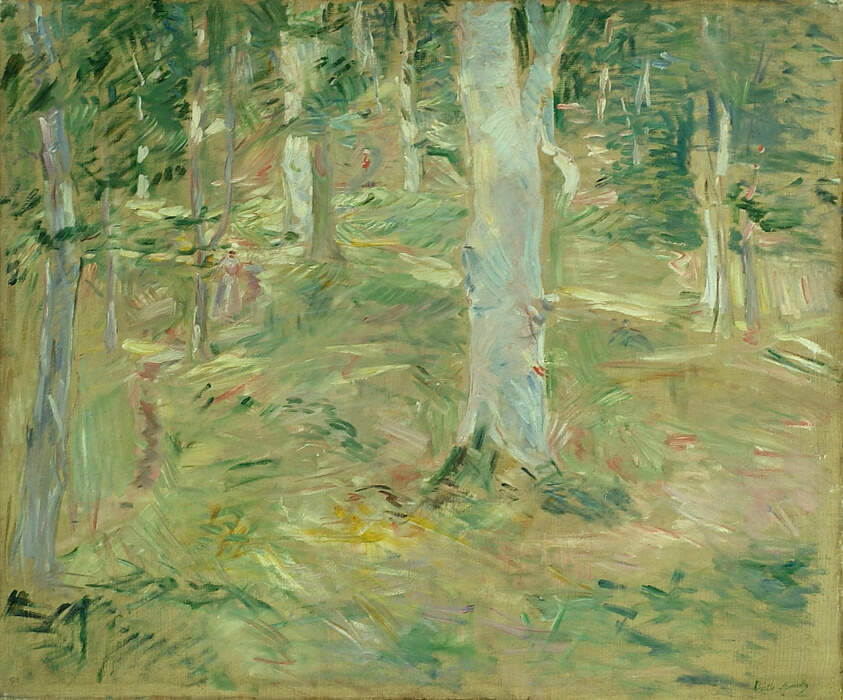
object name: Painting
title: Forêt de Compiègne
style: Impressionism, nineteenth century, 19th century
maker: Berthe Morisot (French, 1841–1895)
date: 1885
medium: Oil on canvas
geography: France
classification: oil on canvas; paint; oil paintings (visual works); french; painting; european painting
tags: landscapes, trees, green (color), France, forests, foliage, nature, leaves, leaf